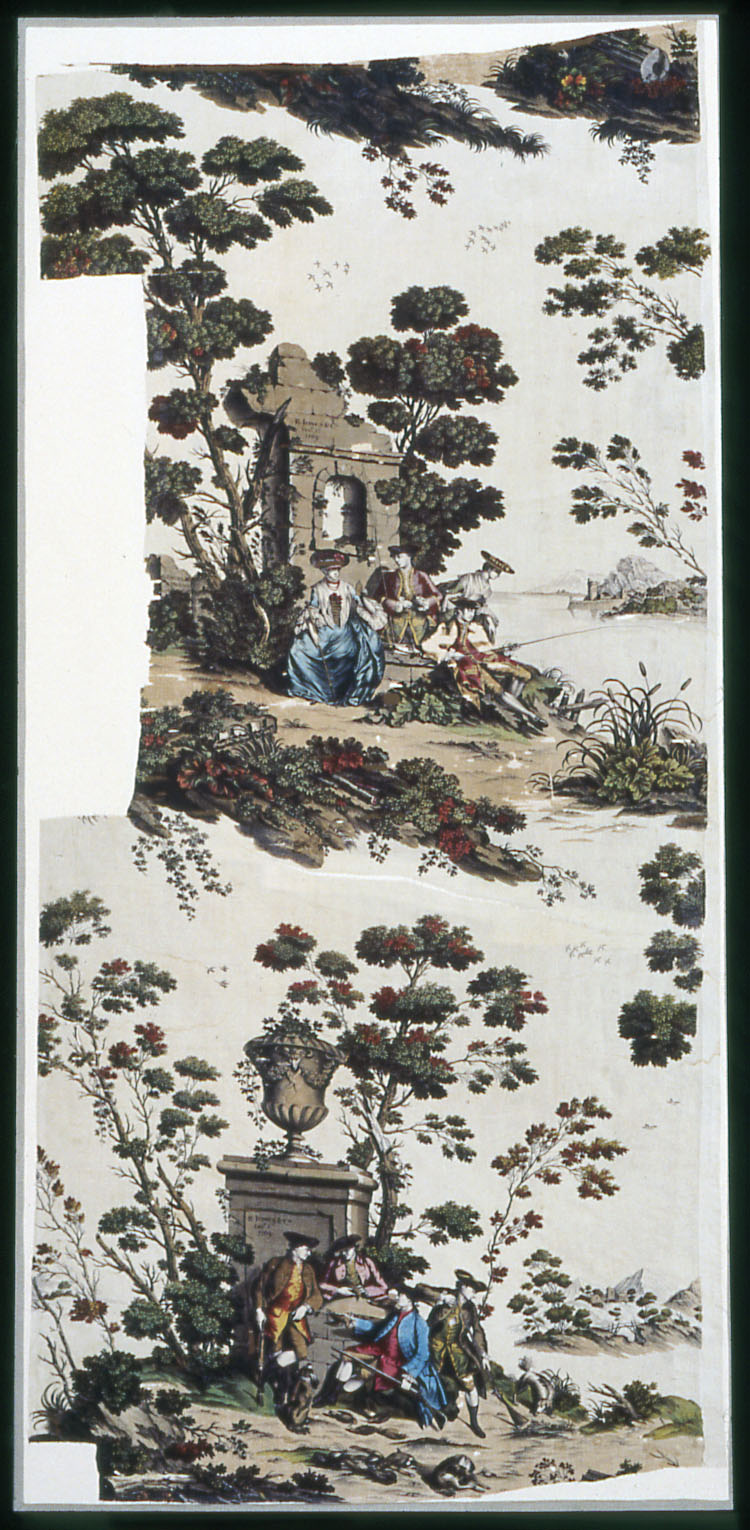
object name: Textile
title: Panel (Furnishing Fabric)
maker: Manufactured by Robert Jones & Co.; England, Old Ford, Middlesex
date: 1769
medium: Linen and cotton, plain weave; copperplate and block printed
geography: Middlesex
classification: textile; weaving - printed; furnishing textile